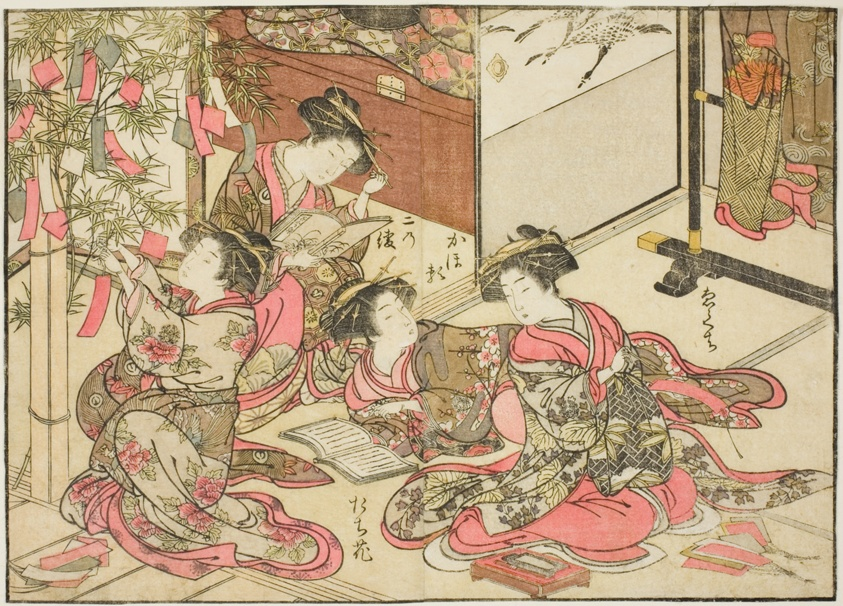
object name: Print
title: Courtesans of Shin Kanaya, from the book "Mirror of Beautiful Women of the Pleasure Quarters (Seiro bijin awase sugata kagami)," vol. 2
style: Japanese (culture or style)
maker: Katsukawa Shunsho; Japanese, 1726-1792; Kitao Shigemasa; Japanese, 1739-1820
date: 1776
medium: Color woodblock print; double-page illustration cut from a book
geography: Japan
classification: woodblock print; print; asian art